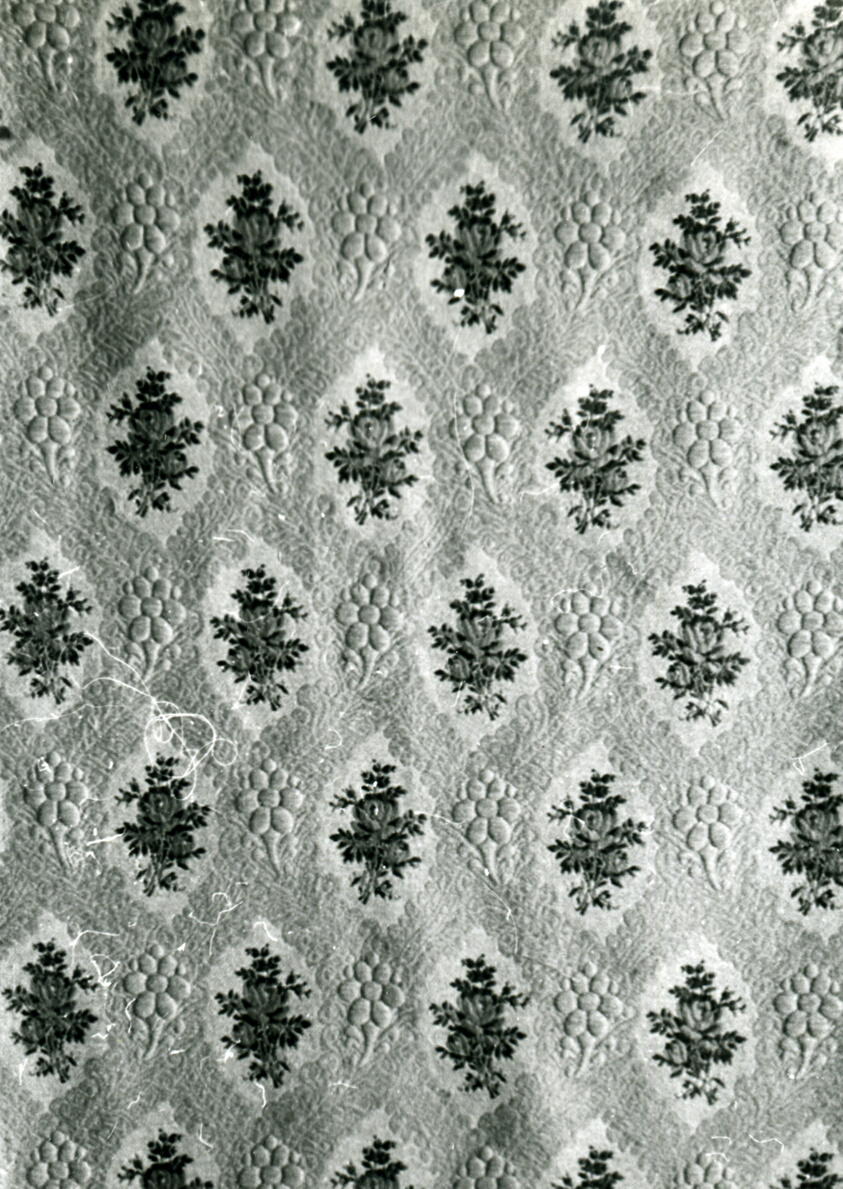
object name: Textile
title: Panel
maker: France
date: 1775/1800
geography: France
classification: textile; weaving